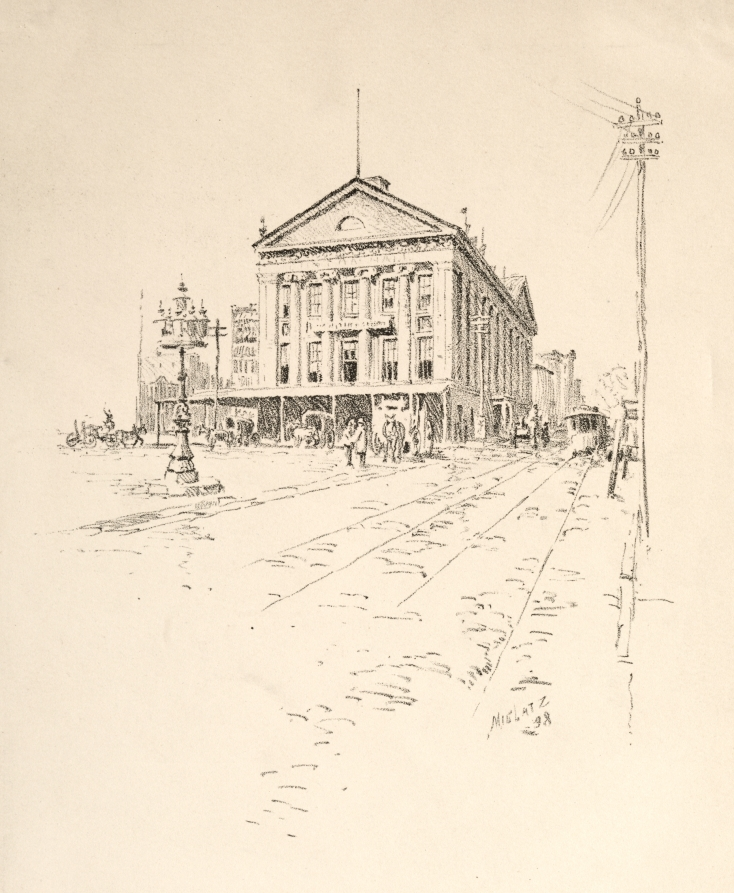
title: Untitled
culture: America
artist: Karl Friedrich Wilhelm Mielatz (American, 1864–1919)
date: 1898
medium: lithograph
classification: Print